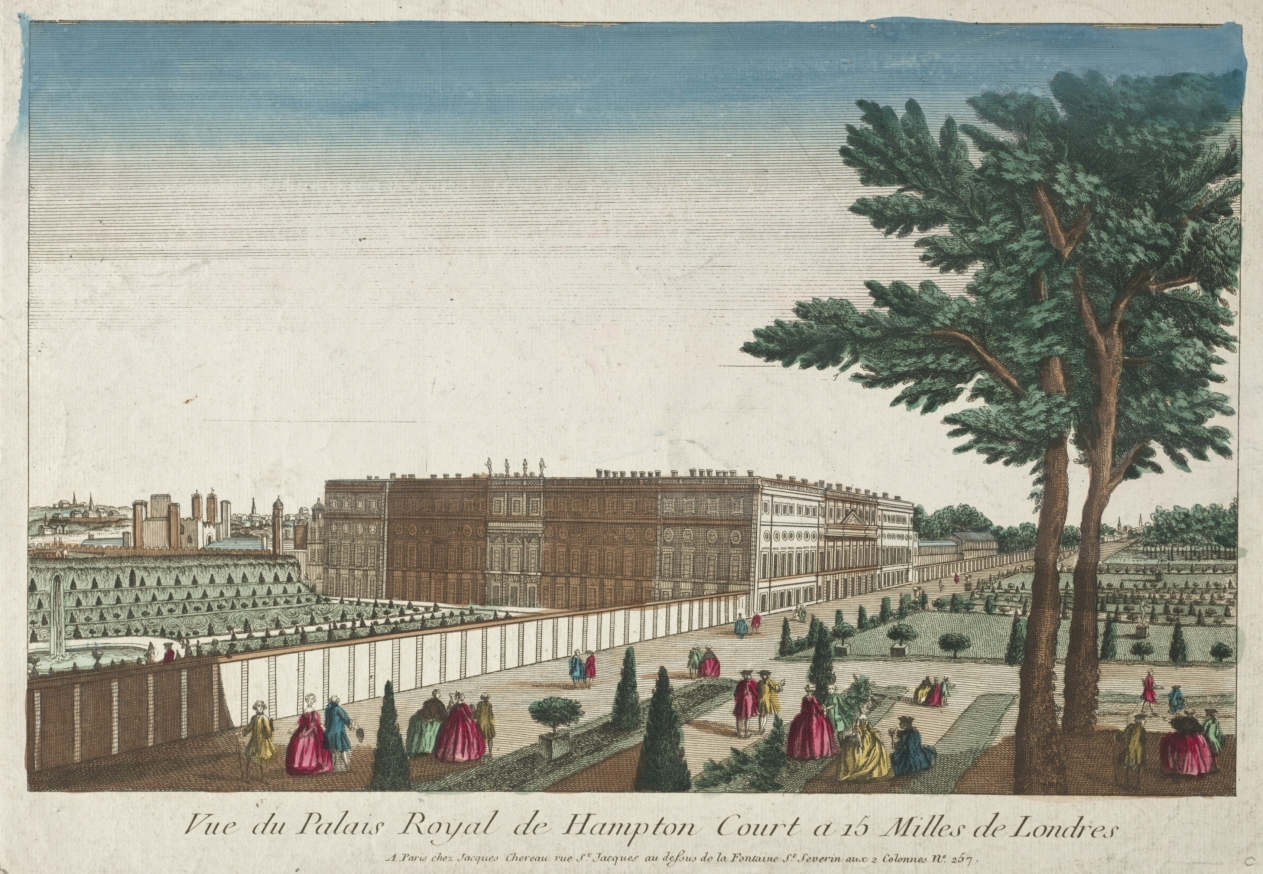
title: View of the Royal Palace of Hampton Court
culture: England, 18th century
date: 18th Century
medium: Hand-colored engraving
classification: Print